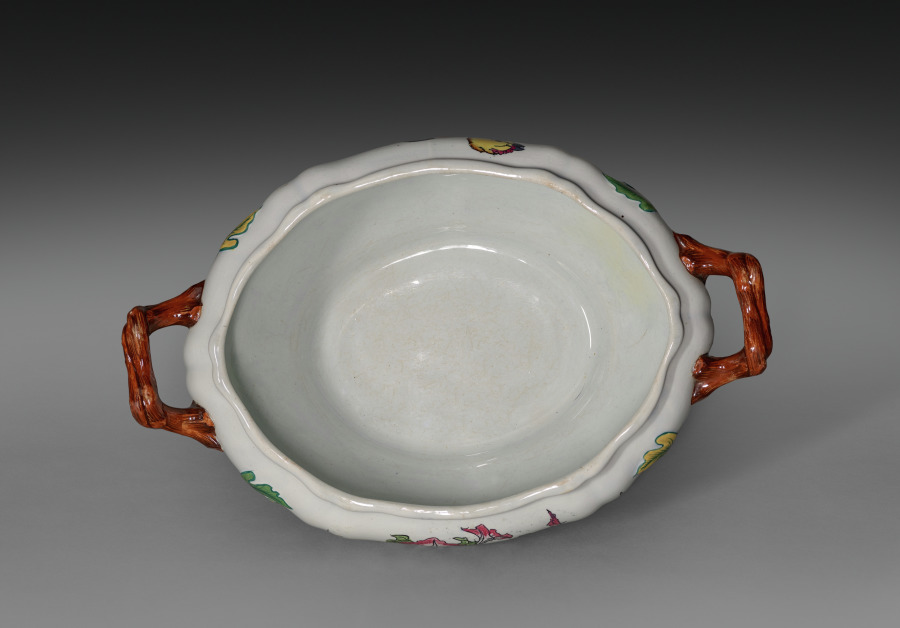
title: Tureen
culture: France, Creil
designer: Félix Bracquemond (French, 1833–1914)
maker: Creil Factory (French)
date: 1866–75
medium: porcelain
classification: Ceramic